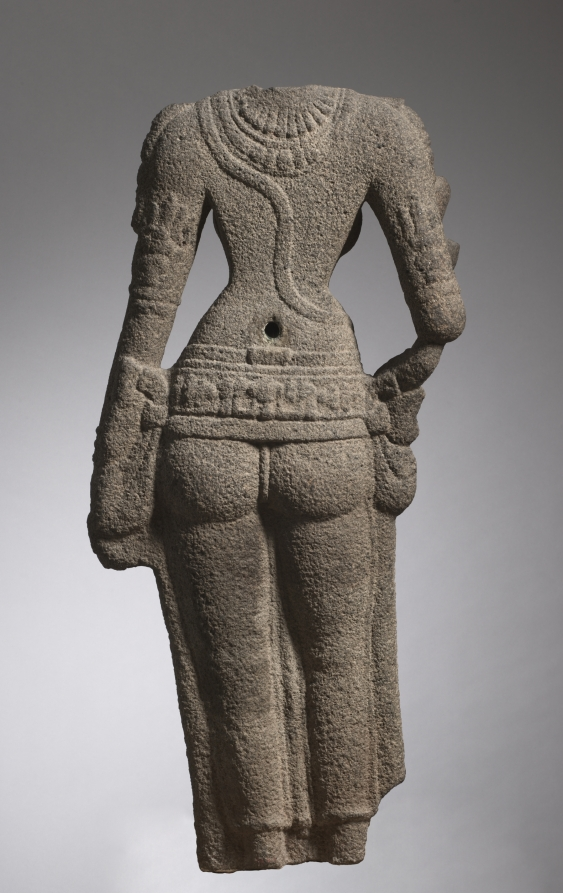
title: (Parvati) Devi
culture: South India, Chola period (900–1200s)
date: 1000s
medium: granite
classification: Sculpture